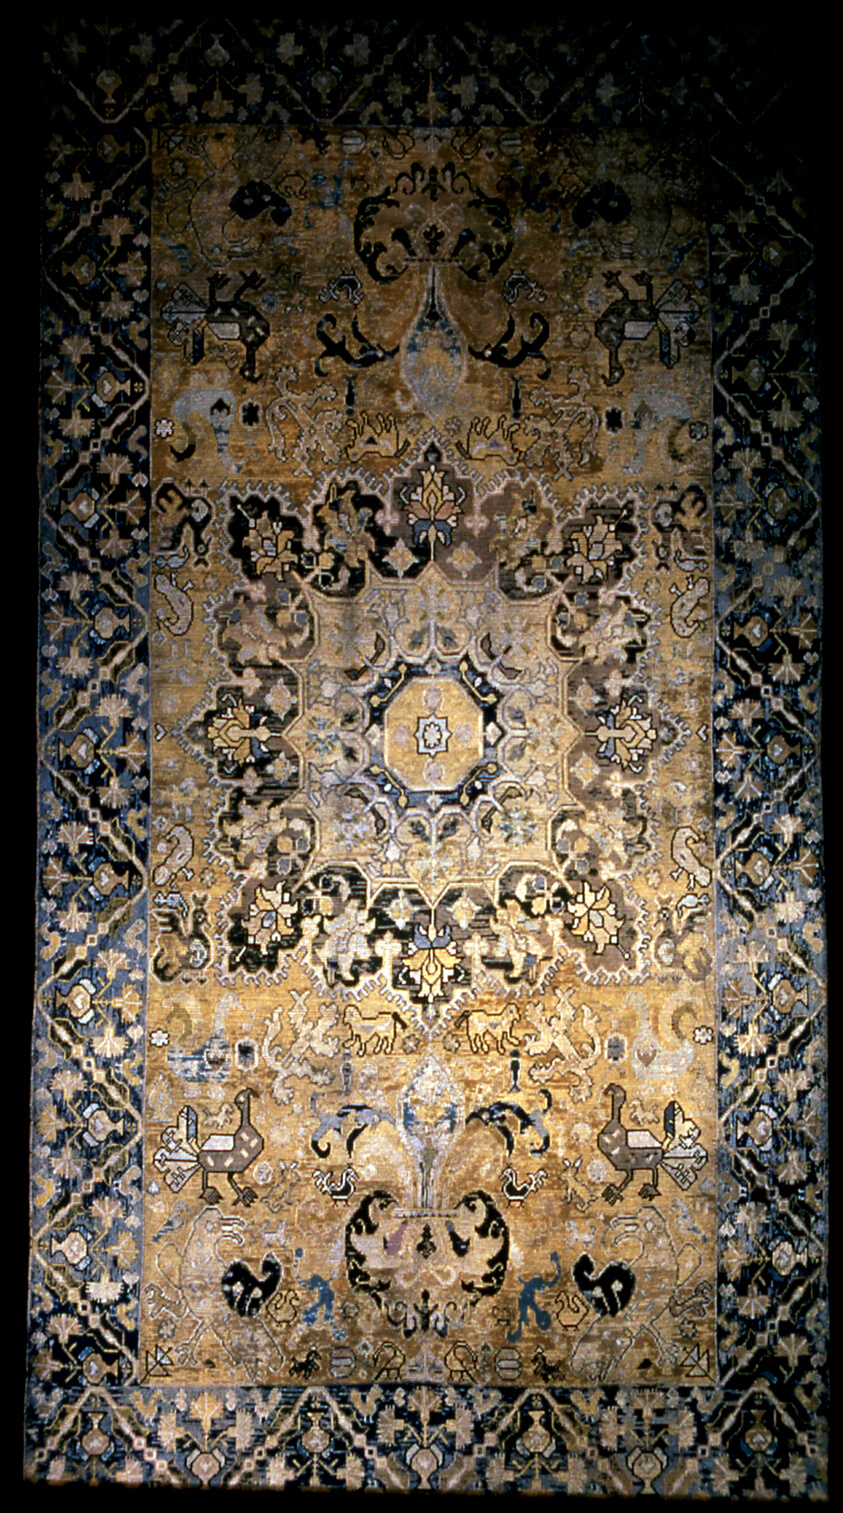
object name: Religious/Ritual Object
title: Altar Carpet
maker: Portugal, Arraiolas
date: 17th century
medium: Linen, plain weave; embroidered with wool in long-armed cross stitches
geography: Spain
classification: textile; needlework - carpet; ritual objects